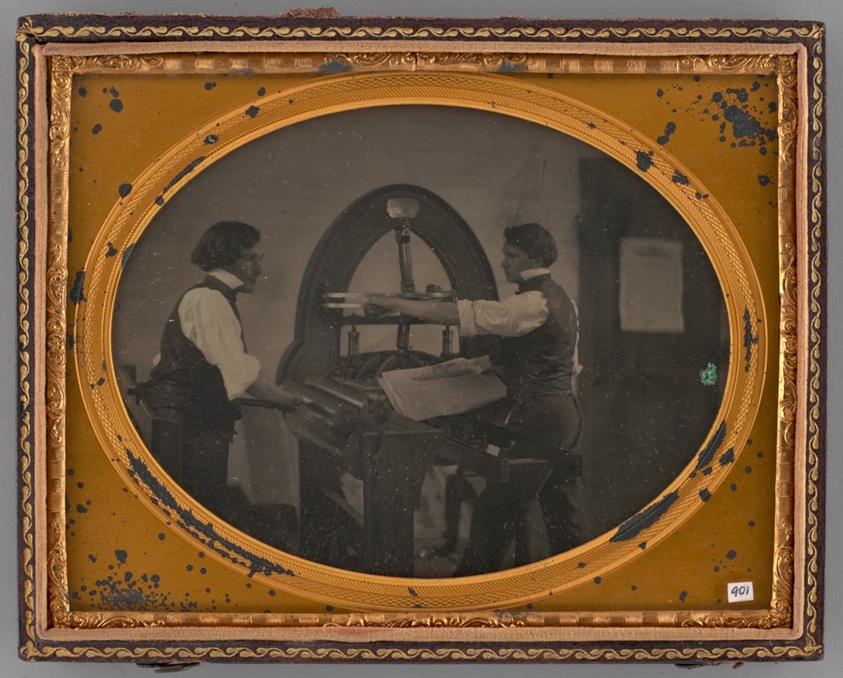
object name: Photograph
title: Untitled (Lynn News)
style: 19th century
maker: Unknown maker; American, 19th century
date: 1853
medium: Daguerreotype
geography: United States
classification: portrait; photography; photographic process; daguerreotype; portrait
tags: lundberg collection, newspapers, people, men